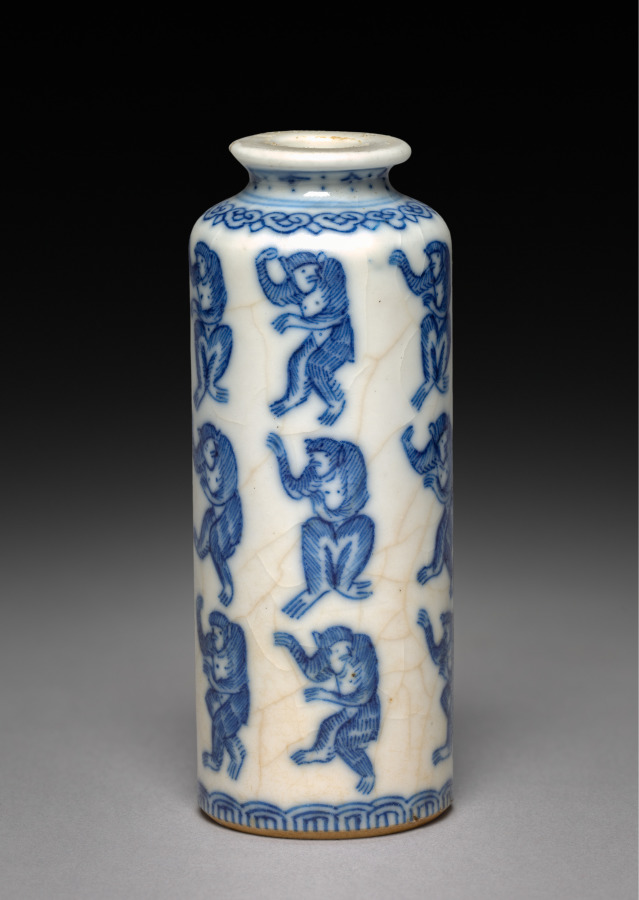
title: Snuff Bottle with Stopper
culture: China, Jiangxi province, Jingdezhen kilns, Qing dynasty (1644-1911), Yongzheng mark and reign (1723-35)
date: 1723–35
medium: porcelain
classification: Ceramic